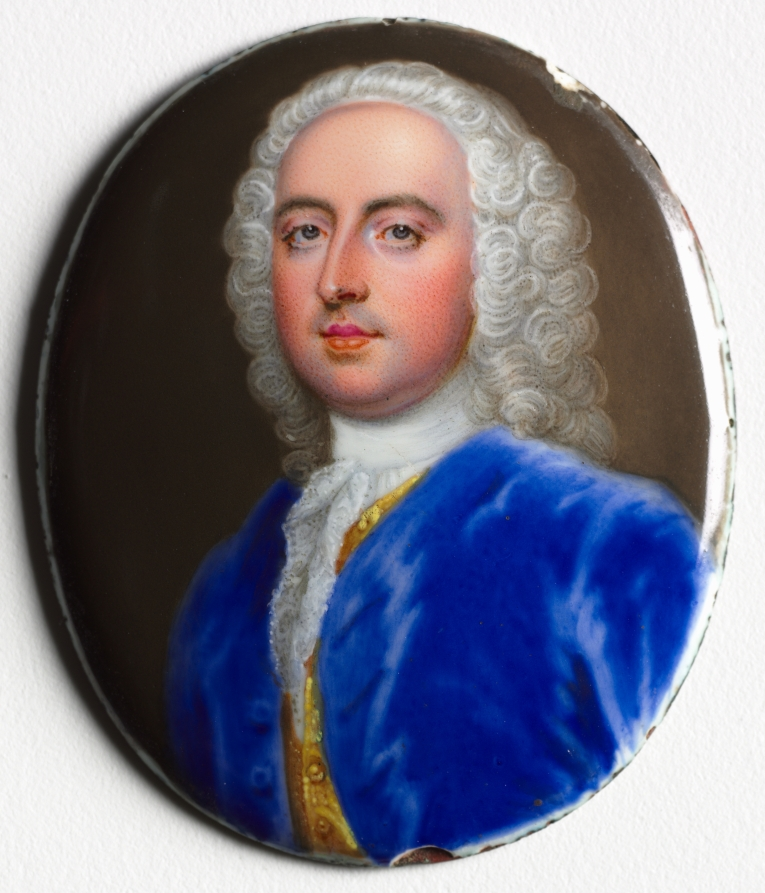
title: Portrait of a Man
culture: England, 18th century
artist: Christian Friedrich Zincke (German, 1683/85–1767)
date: c. 1735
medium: enamel on copper in a gold frame with a blue glass and hair reverse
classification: Portrait Miniature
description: The unknown sitter's shoulders are turned to the right, and he is painted almost full face. He wears a bright blue velvet coat with covered buttons, deep yellow embroidered waistcoat, and white stock collar with double lace frill down the front. His powdered wig falls to his shoulders. He has gray eyes and is clean shaven with rosy cheeks, and the background is dark brown. The miniature is set in a gold locket-style frame. The back displays a lock of dark brown hair inside a border of bright blue foiled glass—a popular framing style for miniatures in the late eighteenth and early nineteenth centuries and, therefore, surely a later addition. Since the publication of the Greene collection catalogue in 1951, the attribution of this miniature has been disputed, with experts alternately suggesting Christian Friedrich Zincke and possibly Charles Boit (1663–1727). The evidence in favor of Zincke, however, is far stronger than it is for Boit, who had not worked in England for over a decade before his death in 1727, several years before the most plausible date for this portrait. Among Zincke’s hallmarks are lips painted two different colors—here, purplish pink on top and orange on the bottom—a practice that became increasingly pronounced later in his career. This portrait also exhibits Zincke’s characteristic treatment of the eyes during this period: he framed the eyes with individually painted black dots to represent eyelashes. The counter-enamel is not inscribed but has the smooth appearance of the counter-enamels customarily associated with Zincke’s later career. A miniature identical in all but the facial features appeared at Christie’s, London, in 2004. Zincke often used this costume consisting of a blue (or sometimes brown) velvet jacket with covered buttons, yellow embroidered waistcoat, and frilled lace cravat. An example that sold at Christie’s in 1996 is signed and dated 1734. Another closely related and unsigned example by Zincke in the Metropolitan Museum of Art has been dated to c. 1745, indicating when this attire was frequently employed by Zincke’s studio.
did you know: Unlike fragile portrait miniatures painted in watercolor on vellum or ivory, which are prone to cracking, fading, and flaking, enamels are resilient, impervious to the effects of light, and retain their striking original colors over time.